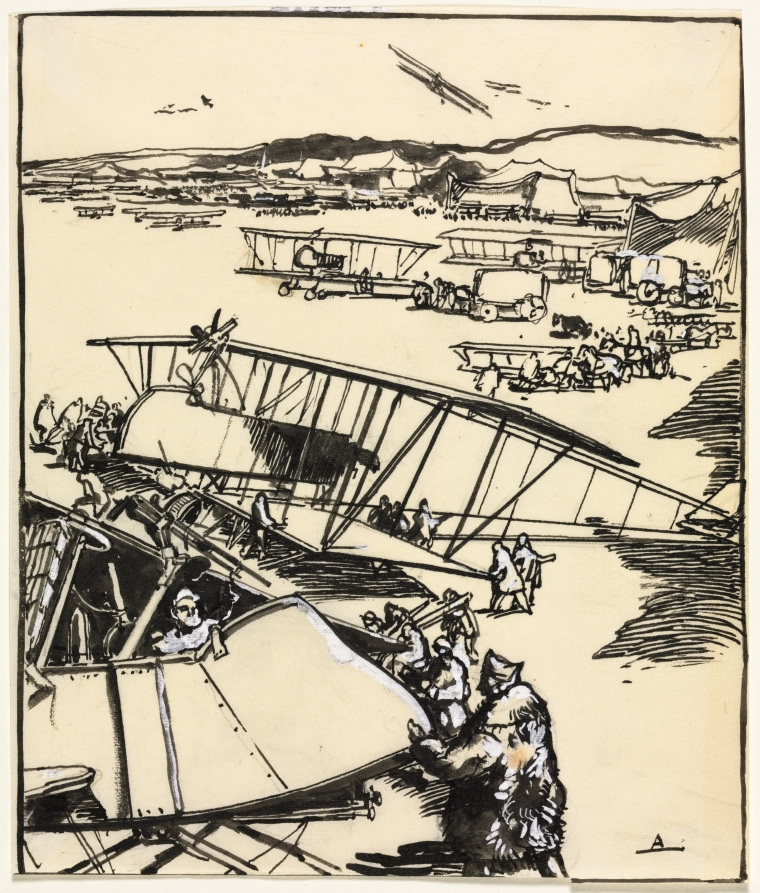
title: Avions reposant sur le terrain (recto)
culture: France, 20th century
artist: Auguste Louis Lepère (French, 1849–1918)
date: 1914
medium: brush and brown ink and wash over pencil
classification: Drawing